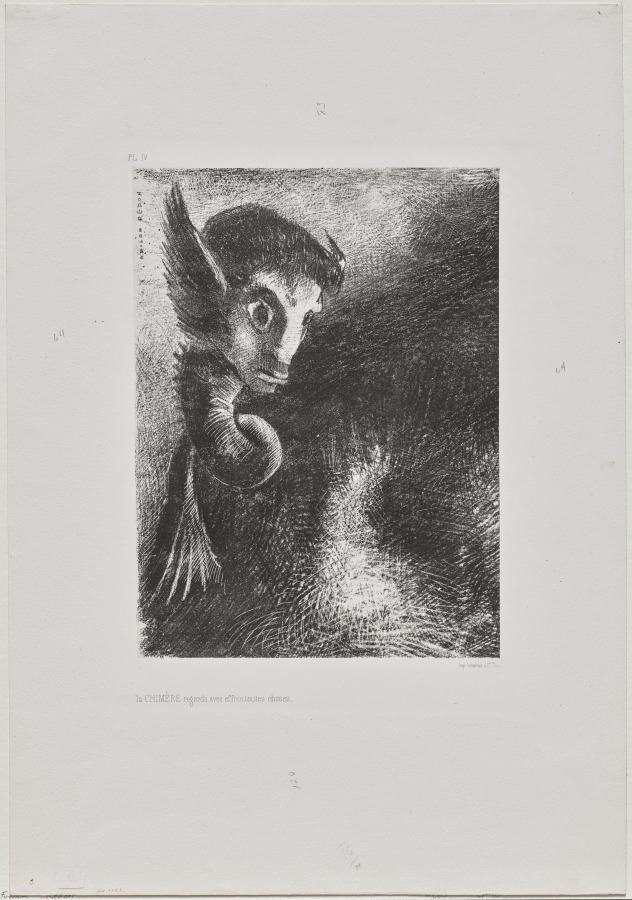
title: The Chimera Gazed at All Things with Fear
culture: France, 19th century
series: The Night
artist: Odilon Redon (French, 1840–1916)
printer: Lemercier & Cie.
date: 1886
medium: lithograph on China paper laid on wove paper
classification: Print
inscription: signed on stone, vertically at upper left: ODILON REDON; printed, below lower right corner of image: Imp. Lemercier & Cie. Paris; inscribed at center below image, in graphite: Amphibie; below lower left corner of image: la CHIMÈRE regarda avec effroi toutes choses; above upper right corner of image: PL. IV